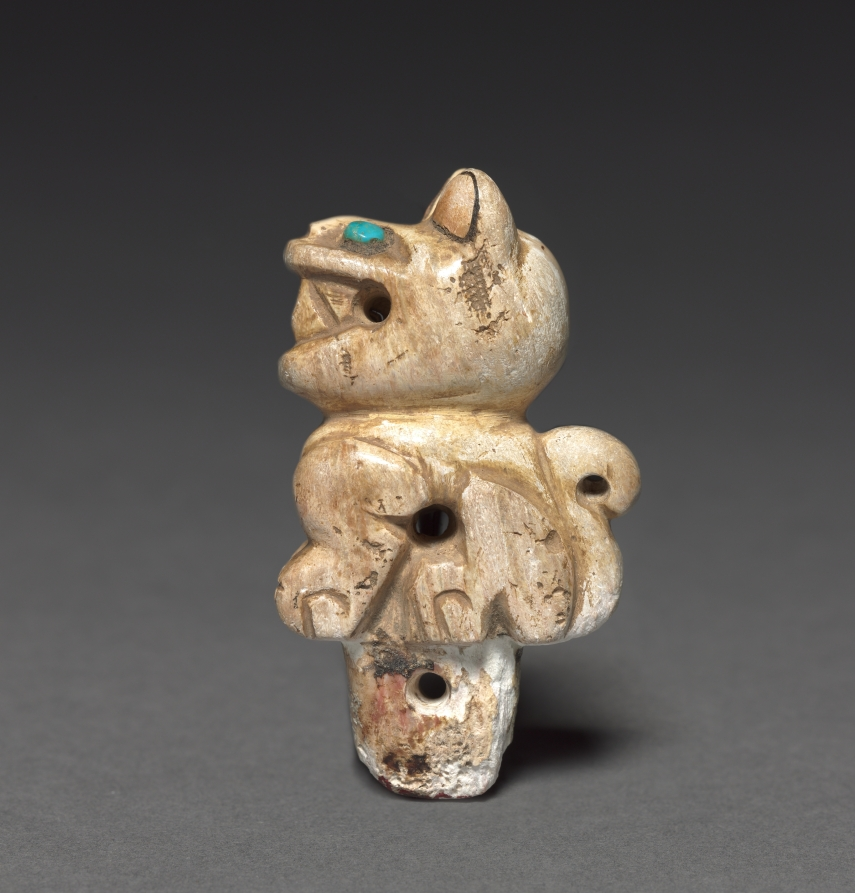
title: Crouching Feline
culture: Peru, Wari (?), 6th-10th Century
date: c. 500–900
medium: stone, turquoise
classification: Jewelry